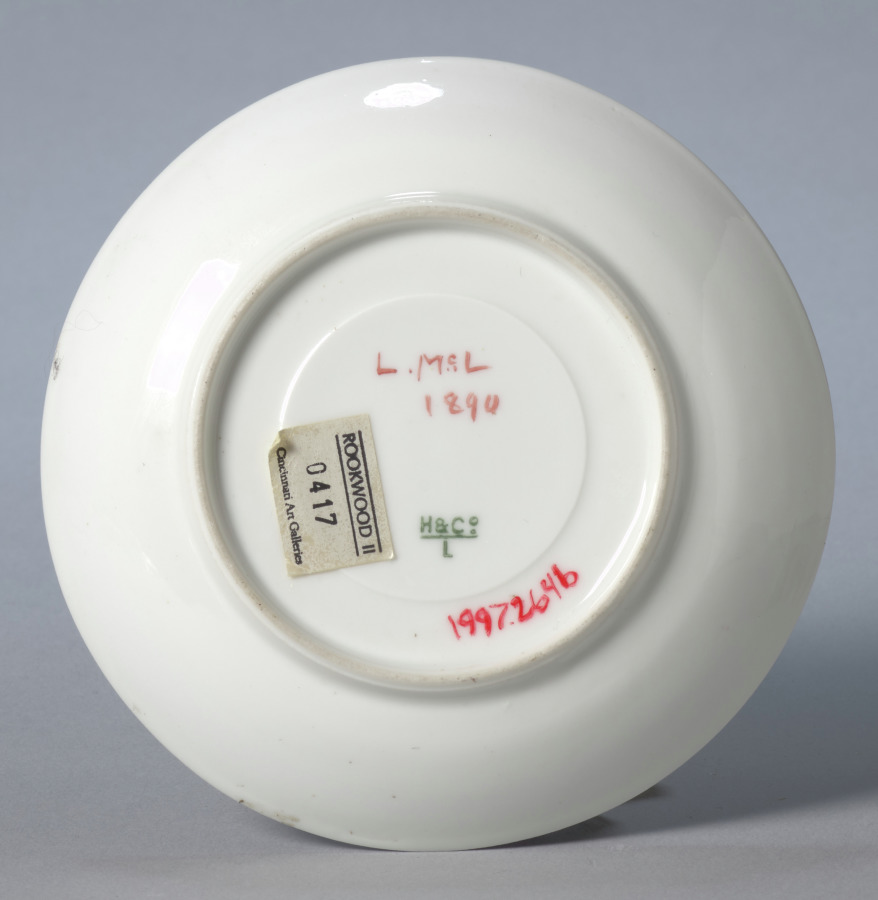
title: Saucer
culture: America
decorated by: M. Louise McLaughlin (American, 1847–1939)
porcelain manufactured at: Haviland & Co. (French)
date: 1890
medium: porcelain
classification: Ceramic